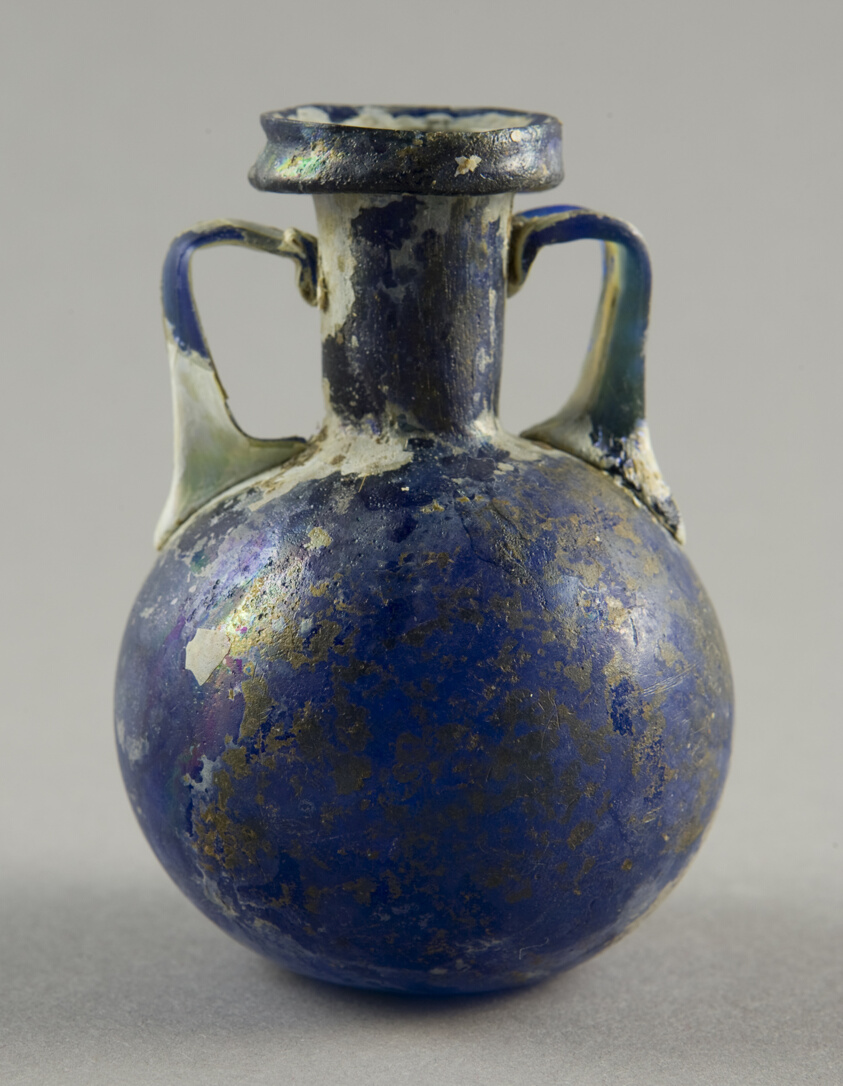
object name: Vessel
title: Bottle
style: syrian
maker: Roman; Levant or Syria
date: 1st-2nd century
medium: Glass, blown technique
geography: Syria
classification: glass; vessel; ancient art